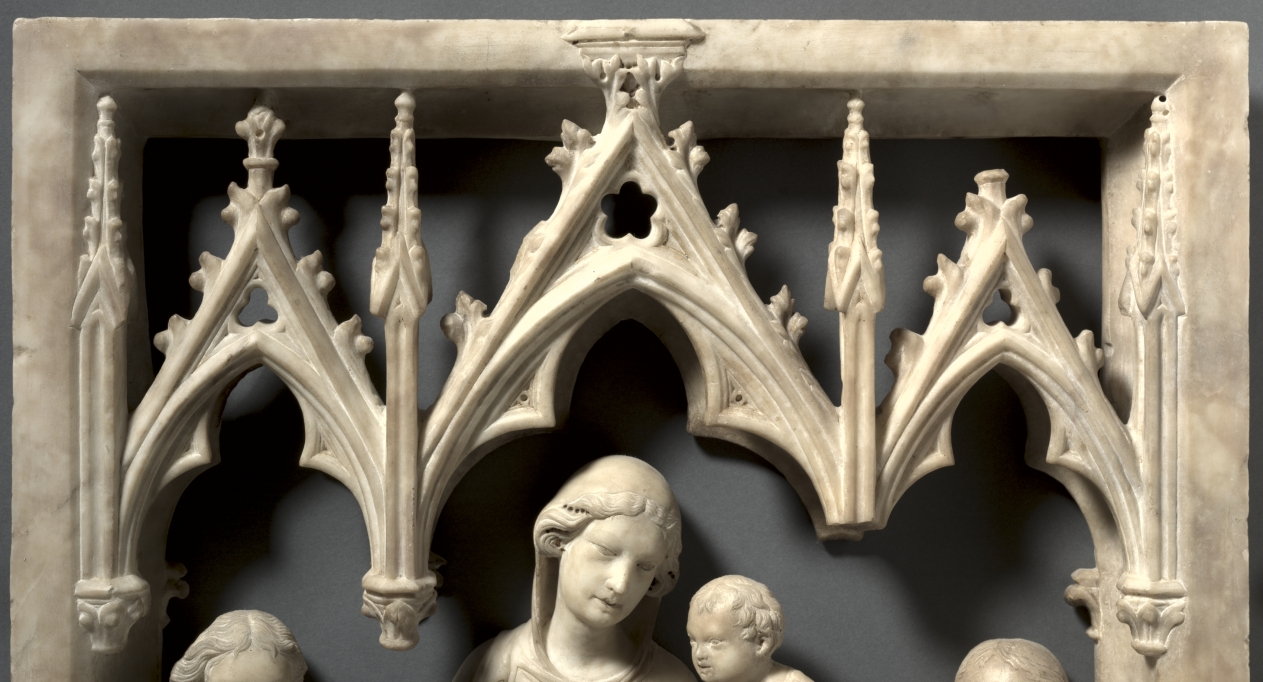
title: Madonna and Child with Saints Catherine and John the Baptist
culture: Italy, Siena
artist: Giovanni di Agostino (Italian, c. 1310–1370)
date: c. 1340–50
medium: marble with traces of polychromy and gilding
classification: Sculpture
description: The Madonna is seated beneath a Gothic-arched canopy flanked by Saints Catherine and John the Baptist. A rectangular frame encloses the group. Most likely from a Sienese church interior, the work is probably a fragment of a larger sculptural program such as a tomb. An authentic Gothic style in sculpture appeared in Tuscany from the mid 1200s through about 1350 elucidated by the work of Giovanni di Agostino, Nicola and Giovanni Pisano, and others who were active on Siena Cathedral’s sculptural program. Agostino’s work suggests an awareness of Gothic sculpture and the decorative arts in France from which he borrowed freely. This relief was probably completed just before the plague of 1348, an event which altered the degree and character of Sienese art.